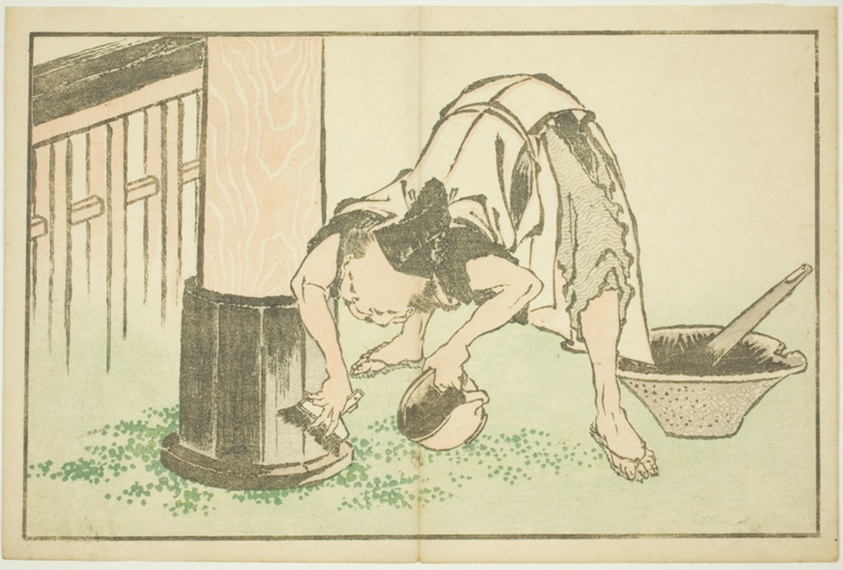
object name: Print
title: Craftsman working on Temple, from The Picture Book of Realistic Paintings of Hokusai (Hokusai shashin gafu)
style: Japanese (culture or style)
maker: Katsushika Hokusai 葛飾 北斎; Japanese, 1760-1849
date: c. 1814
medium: Color woodblock print (album sheet)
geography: Japan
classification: woodblock print; print; asian art